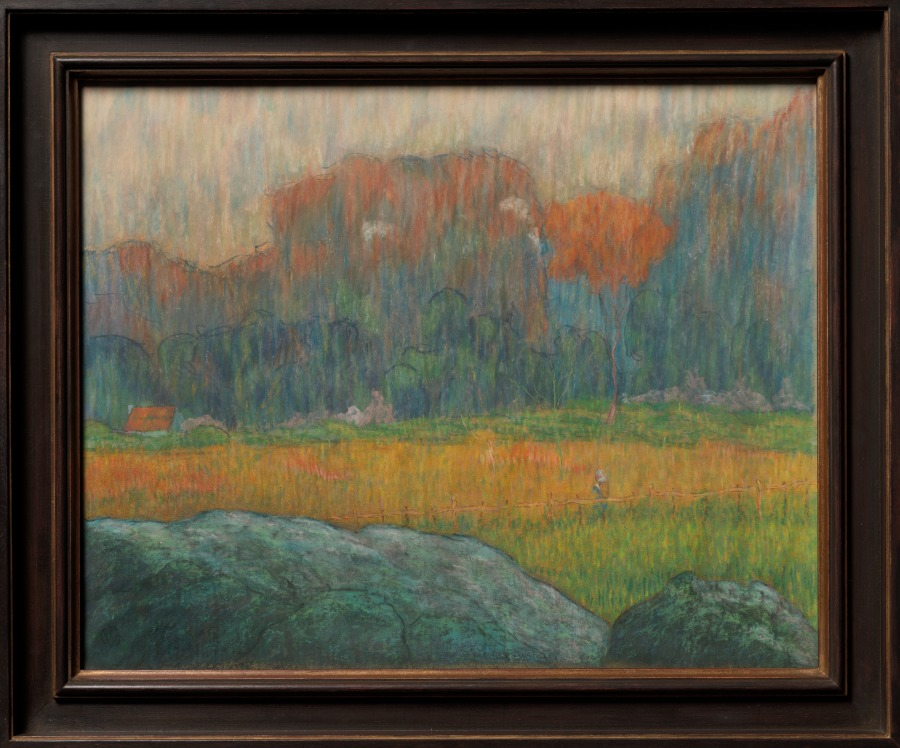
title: Landscape with Figure and Houses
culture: France, 19th century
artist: Claude-Emile Schuffenecker (French, 1851–1934)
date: c. 1891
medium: pastel on brown wove paper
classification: Drawing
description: To record rural landscapes, Emile Schuffenecker often took advantage of recently constructed train lines that facilitated travel outside Paris. Here, he portrayed Meudon, a southwestern suburb. Schuffenecker used easily portable pastel sticks to sketch outdoors, producing studies that he later developed into finished works in his studio. With distinctive vertical marks, he combined complementary colors to increase their intensity, choosing textured brown paper to further this impact. The shimmering result is grounded by massive lichen-covered rocks in the foreground that evoke ancient monumental stones in the area and give the drawing a sense of timelessness.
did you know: On the back of this drawing, Emile Schuffenecker noted "Nocturne Espagnol / flute," referencing a specific piece of music that provided inspiration for the work.